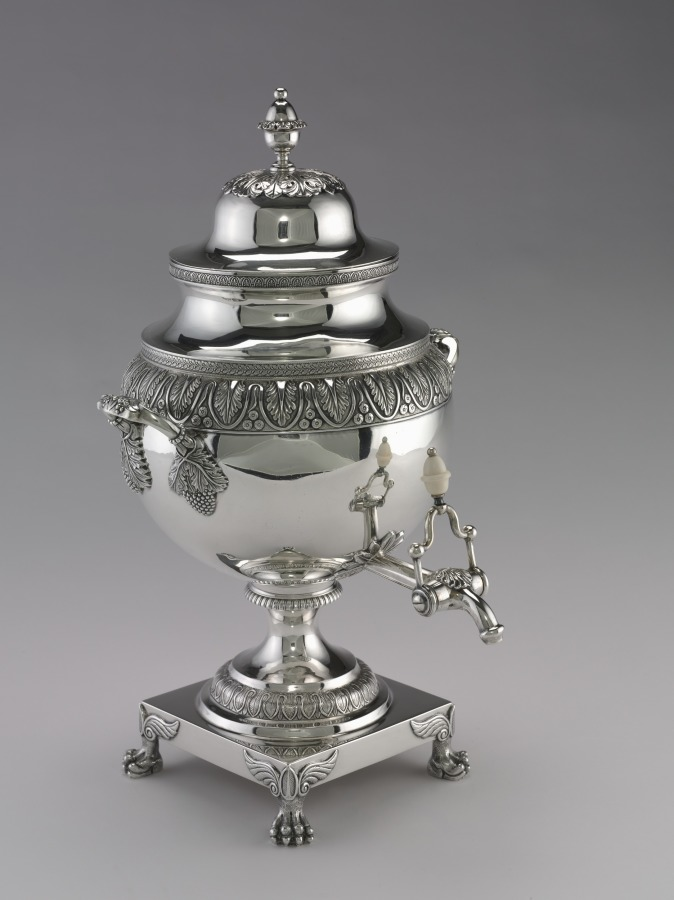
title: Tea Urn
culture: America, Pennsylvania, Philadelphia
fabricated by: Harvey Lewis (American, 1835)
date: 1811–25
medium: silver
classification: Silver